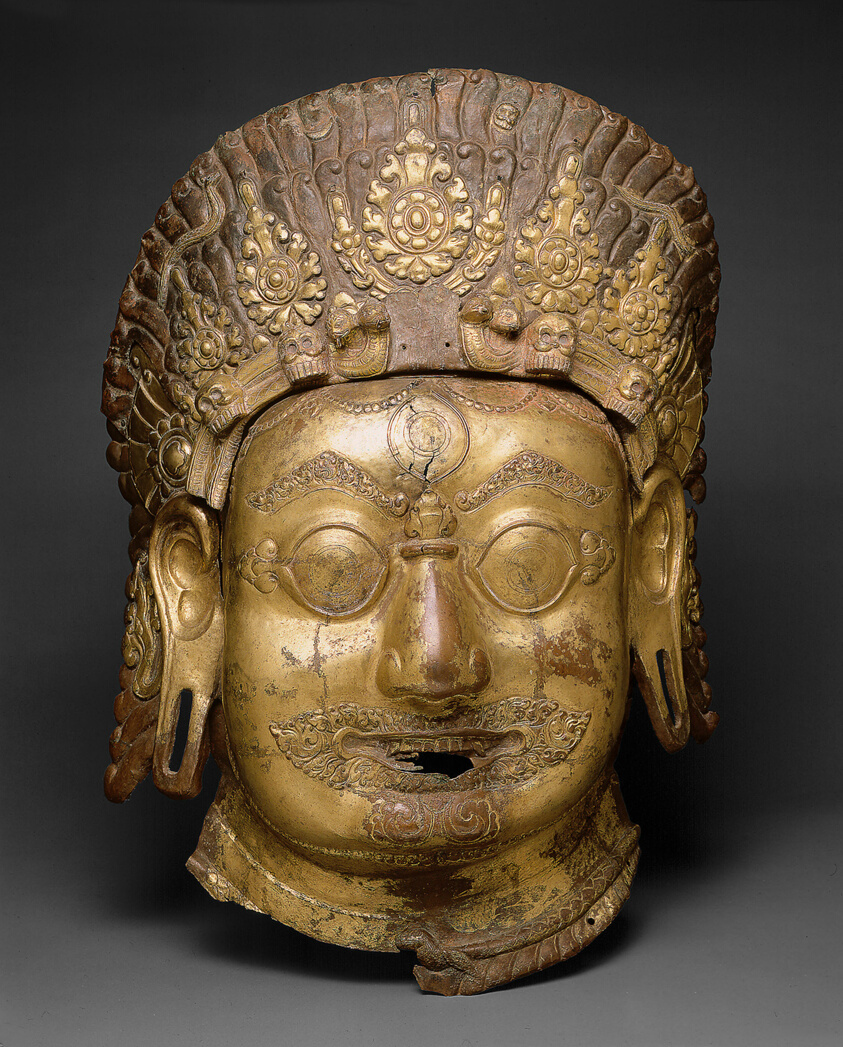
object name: Sculpture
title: Head of Bhairava, A Horrific Form of God Shiva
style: Himalayan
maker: Nepal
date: Malla period, 16th/17th century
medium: Gilt copper worked in repoussé with pigments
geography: Nepal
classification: sculpture; asian art